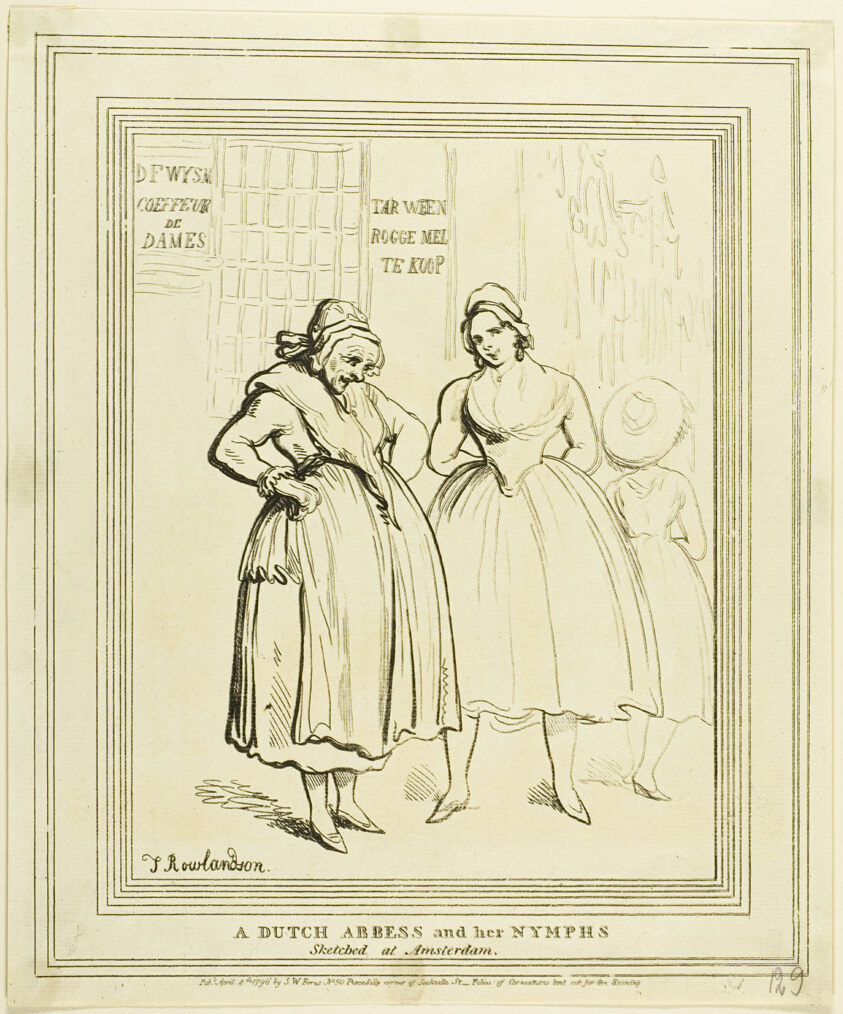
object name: Print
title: A Dutch Abbess and Her Nymphs Sketched at Amsterdam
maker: Thomas Rowlandson (English, 1756-1827); published by S.W. Fores (English, 1761-1838)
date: published April 4, 1796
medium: Hand-colored etching on ivory wove paper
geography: England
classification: etching; print; prints and drawing